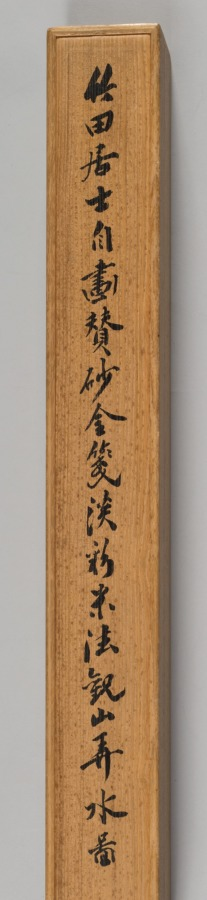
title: Mountain View and Blue Water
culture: Japan, Edo period (1615–1868)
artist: Tanomura Chikuden (Japanese, 1777–1835)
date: early 1800s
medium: hanging scroll; ink, color, and gold on paper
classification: Painting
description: Tanomura Chikuden was an eminent painter whose adopted son, Tanomura Chokunyū (1814–1907), was Seifū Yohei III’s painting teacher. This work was displayed at a gathering commemorating the 10th anniversary of Chokunyū’s death, something we know only because its custom-made box and archival documents have been carefully kept together. The box inscription also confirms that Chikuden was emulating the style of the Mi family of painters, active during China’s Southern Song dynasty (1127–1279). The painting’s Chinese-style silk wrapper is inscribed and sealed on its interior by members of Chokunyū’s community.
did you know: The mountain shapes are built up with multiple small wet strokes.